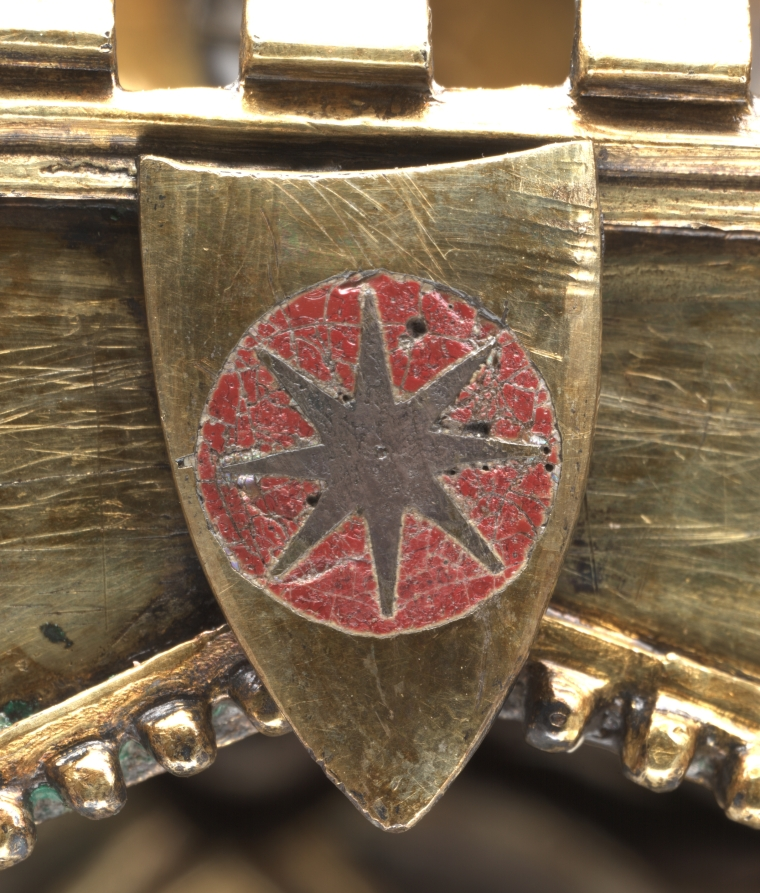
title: Table Fountain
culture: France, Paris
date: c. 1320–40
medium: gilt-silver and translucent enamels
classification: Metalwork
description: Conceptually and stylistically, this object is beyond all else a piece of Gothic architecture in miniature with vaults, pinnacles, columns, and traceried arches. Though the artist who created it is unknown, he was unquestionably inspired by the great Gothic buildings of his time. The table fountain is a three-tiered assembly combining cast elements with bent sheets of gilt-silver. To these have been attached a series of enamel plaques representing grotesque figures, some of which play musical instruments. Water wheels and bells were added to capture motion and sound. The rich detail, precious materials, and involved ornamentation of this deluxe object suggest it would have been expensive to produce and highly treasured by its original owner, someone of high status, and would have been deployed as an object of spectacle. This is the most complete example of its type known to survive from the Middle Ages. Medieval inventories reveal that small fountains like this, often taking various forms, and generally made from precious metals, once existed in large numbers, thus making the Cleveland table fountain an extremely rare object.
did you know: This fountain with its minute architectural details and finely made enamel plaques displayed the wealth and refinement of the owner as it entertained his guests. Imagine hearing the ringing of the tiny bells when this fountain was in use.